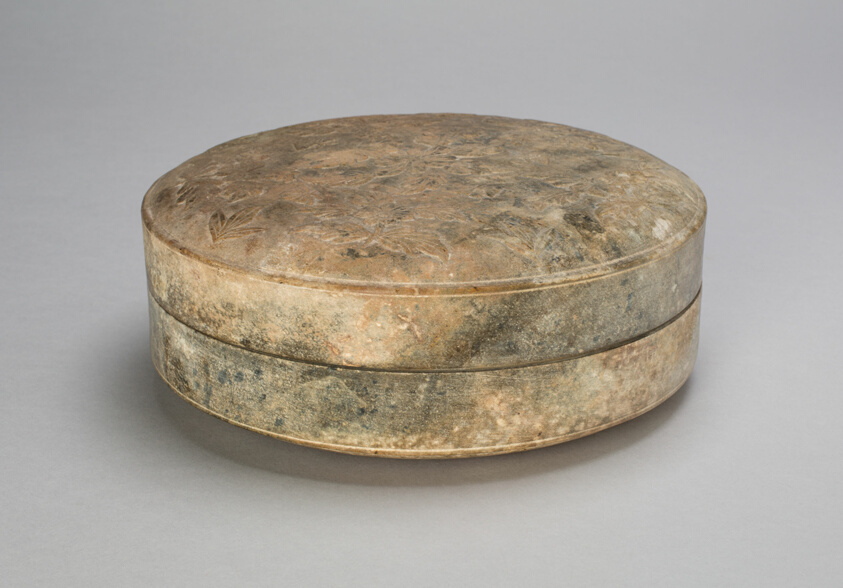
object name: Vessel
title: Round Covered Box with Flowers and Leaves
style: Chinese (culture or style)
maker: China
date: Tang dynasty (618–907)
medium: Stone with carved decoration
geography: China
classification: ceramics; asian art; vessel